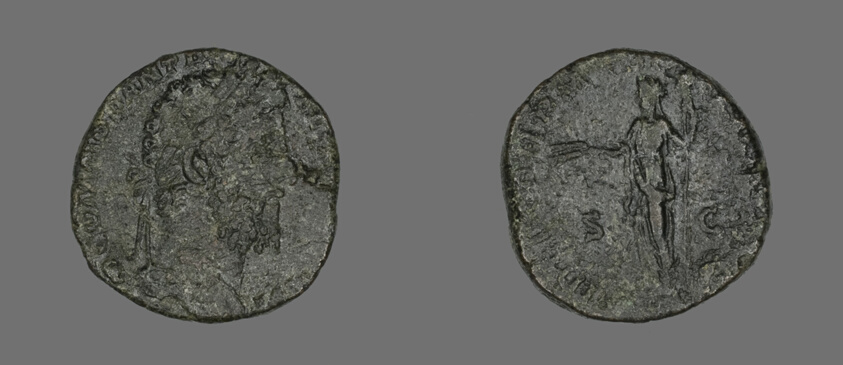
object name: Coin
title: Sestertius (Coin) Portraying Marcus Aurelius or Lucius Verus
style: roman (ancient, style or period), ancient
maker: Roman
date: 161-180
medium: Bronze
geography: Roman Empire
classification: coin; ancient art